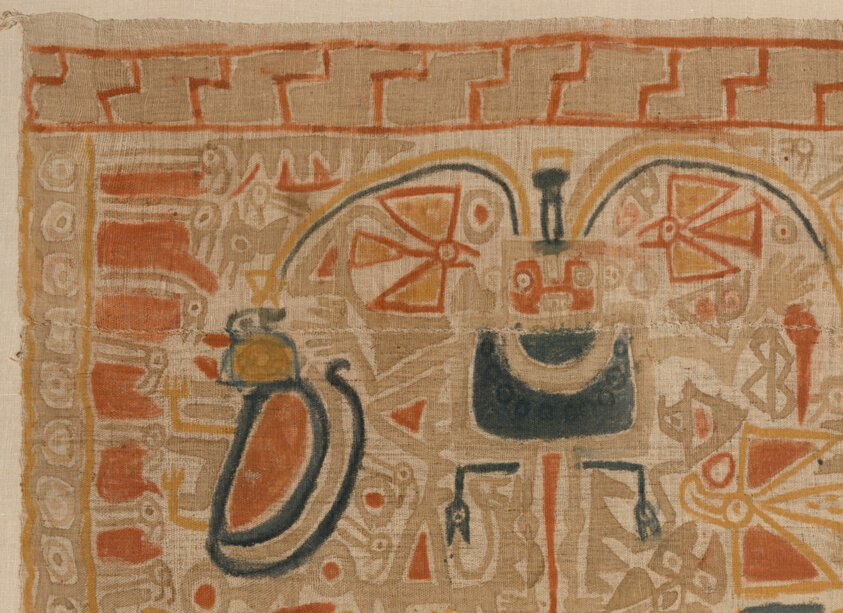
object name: Textile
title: Painted Textile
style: chimú capac, Arts of the Americas, andean, peruvian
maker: Probably Chimu Capac, Supe Valley, north coast, Peru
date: c. 1000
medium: Cotton, plain weave; painted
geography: Peruvian North Coast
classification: textile; cotton; art of the americas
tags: figures (representations), feline, birds, waves, serpents